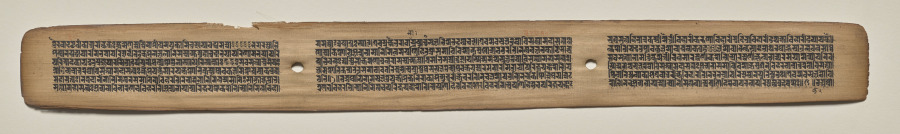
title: Text, Folio 131 (recto), from a Manuscript of the Perfection of Wisdom in Eight Thousand Lines (Ashtasahasrika Prajnaparamita-sutra)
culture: Eastern India, Bihar, Vikramashila Monastery. Painting: Nepal, Kathmandu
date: Sunday, September 14, 1119 (year 239 of the Newar Samvat in the month of Ashvina)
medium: gum tempera and ink on palm leaves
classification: Painting